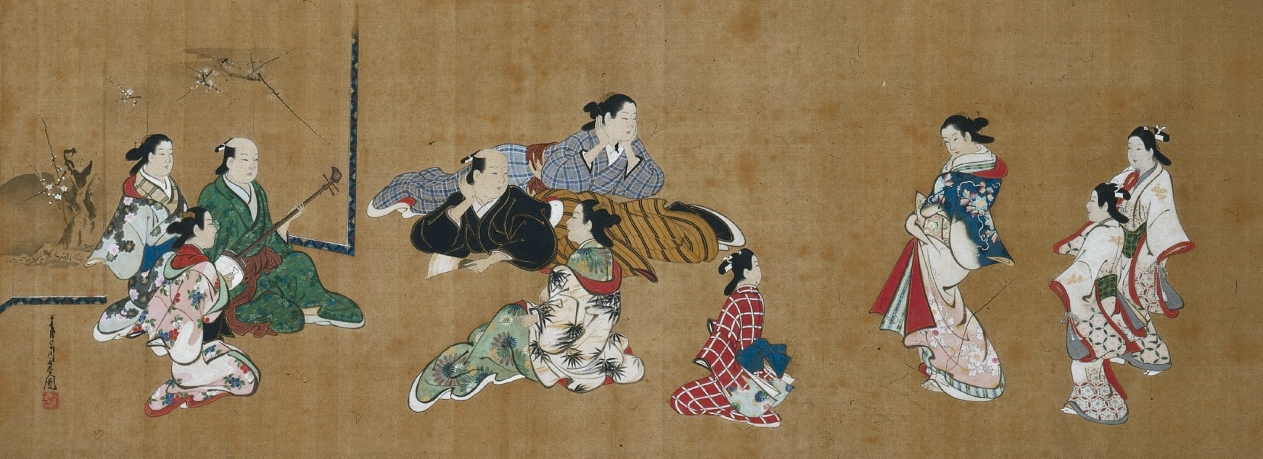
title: Entertainment Scene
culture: Japan, Edo period (1615–1868)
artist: Miyagawa Chōshun (Japanese, 1683–1753)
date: c. 1710–53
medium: hanging scroll; ink and color on silk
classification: Painting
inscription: artist's signature and seal lower left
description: This painting captures the moment when a high-ranking courtesan accompanied by two trainees makes her grand entrance into a salon. The guest of honor, a samurai who reclines beneath a striped robe while dangling his fan, turns from the musical entertainment to gaze at the spectacle of her arrival. The fortunes of everyone in the room depend on how she orchestrates the rest of the evening, as the more the samurai spends on her services, the more trickles down to the other entertainers who are present.